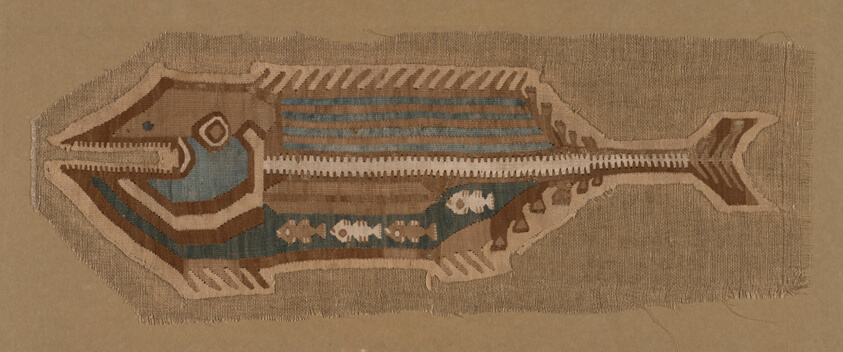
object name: Textile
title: Fish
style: Pre-Columbian, chancay, late intermediate period, americas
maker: Rimac (North coast, Peru)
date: 1000/1476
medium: Cotton, slit tapestry weave with eccentric wefts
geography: Peru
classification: textile; weaving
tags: animals, super/natural